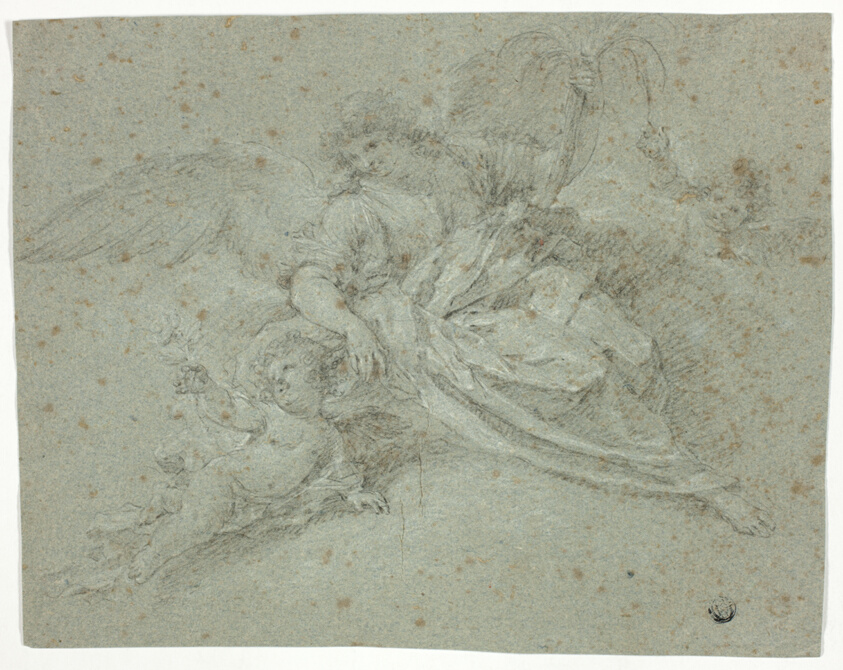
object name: Drawing and Watercolor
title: Angel and Two Putti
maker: Moncayo Pignatelly (Spanish, c. 1700-1770)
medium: Black chalk, heightened with white chalk, on blue laid paper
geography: Spain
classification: graphite; drawings (visual works); prints and drawing